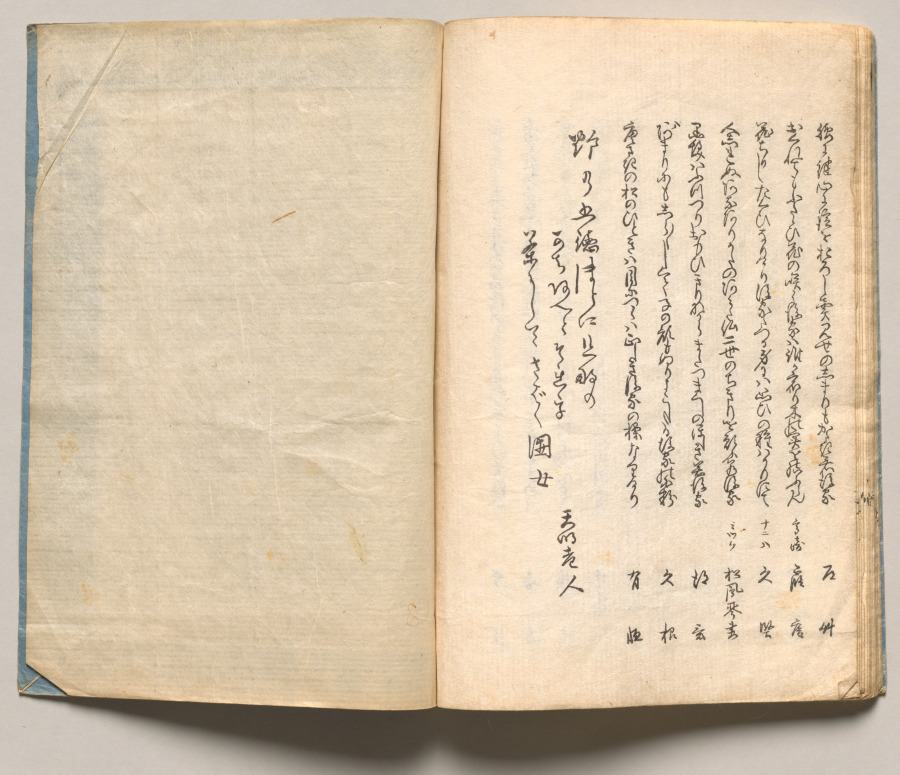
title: Spread Twenty-One from Volume One of People of Japan in Light Verse (Kyōka)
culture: Japan, Edo period (1615–1868)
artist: Utagawa Hiroshige (Japanese, 1797–1858)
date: 1857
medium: Woodblock-printed book; ink and color on paper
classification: Bound Volume